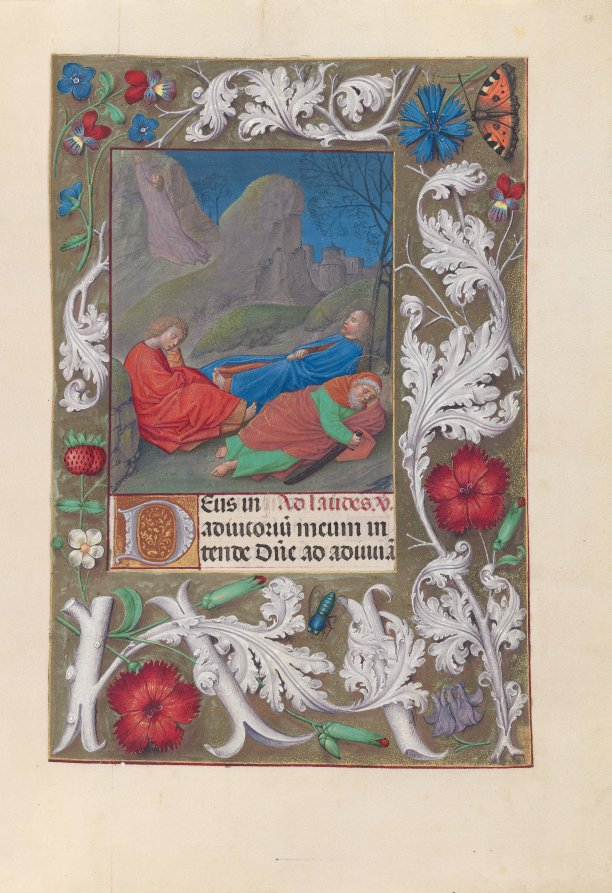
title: Hours of Queen Isabella the Catholic, Queen of Spain: Fol. 57r, Agony in the Garden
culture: Flanders, Ghent and Bruges, late 15th century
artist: Master of the First Prayerbook of Maximillian (Flemish, c. 1444–1519)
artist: and Associates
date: c. 1500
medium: ink, tempera, and gold on vellum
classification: Bound Volume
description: This manuscript was illuminated by a circle of at least five highly organized manuscript painters active in the Flemish cities of Ghent and Bruges. The principal illuminator was Alexander Bening, who painted the majority of the book's miniatures. Manuscripts produced by this circle of artists are renowned for the decoration of their borders, which typically feature a rich variety of realistically-painted flowers, birds, and butterflies. This prayer book, called a book of hours, was intended not for a cleric, but for the private devotions of a lay person-in this case, Isabella the Catholic, Queen of Spain (1451-1504). Isabella's coat of arms embellishes the book's frontispiece. It is unlikely that the book was commissioned by the Queen herself; rather, she probably received it as a diplomatic gift from someone courting her patronage, perhaps Cardinal Francisco Jimenez de Cisneros. A Franciscan friar, Jimenez was dependent upon Isabella for his advancement, first to the post of Queen's confessor in 1492, and then to Archbishop of Toledo in 1495.